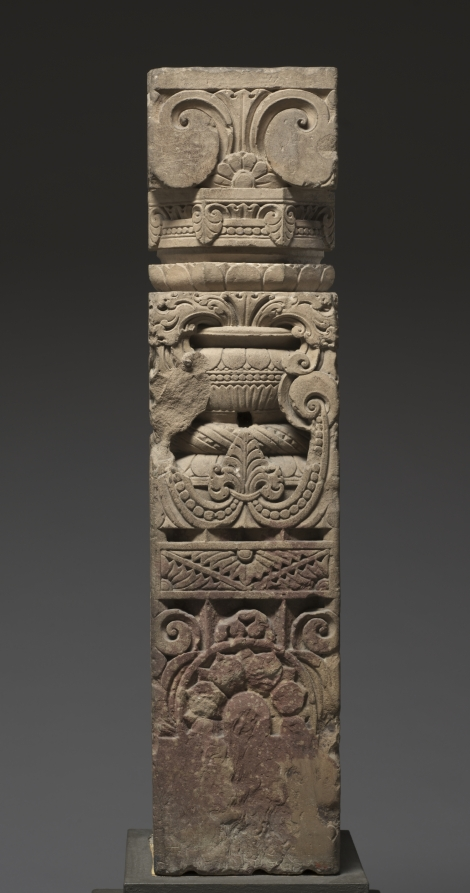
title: Monolithic Pillar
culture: Northern India, Mathura, early medieval period, 7th-8th century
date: 600s–700s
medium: red sandstone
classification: Sculpture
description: The central motif of this temple pillar is a pot, out of which vegetal forms exuberantly emerge, indicating bounty and abundance. The pot itself is decorated with lotus petals, leaves, and a band of pearls. The overflowing pot is a pervasive symbol in India to reference the prosperity and productivity that will result from worship and prayers at the holy site. It also symbolizes the auspiciousness and beauty of the created world.